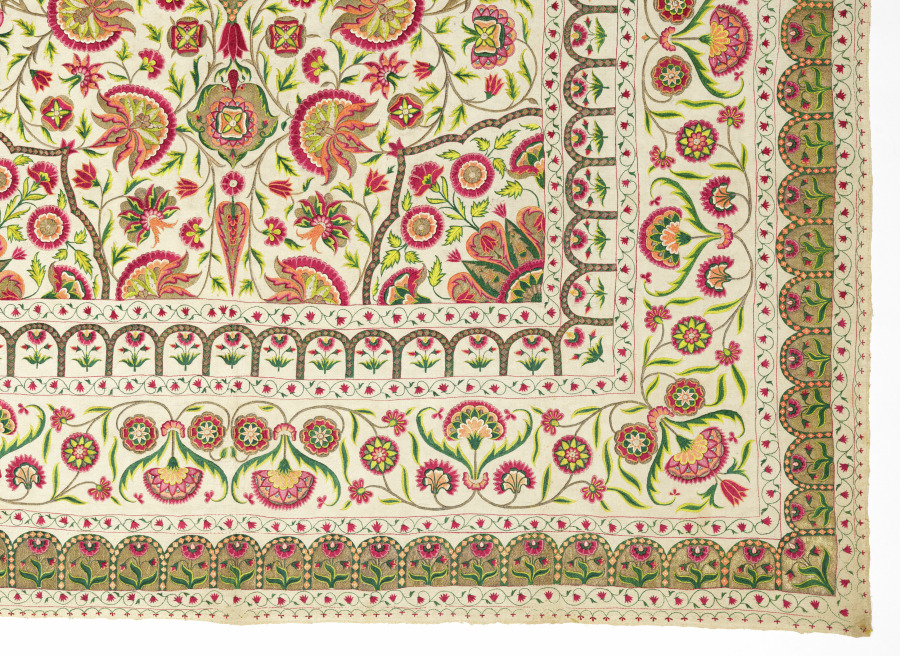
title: Spread with floral medallion pattern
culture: Mughal India, Deccan, probably Goa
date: 1700s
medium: Cotton: plain weave, quilted; silk and gilt-metal thread: embroidery, couched laid work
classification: Embroidery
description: This textile could have been used as a covering for seating on the floor or as a bedspread in either an Indian or European setting. In any case, it was not meant to be walked on. Its material and imagery testify to flourishing international relationships. The arabesque designs, consisting of swirling vines with large and small flowers, recall a radiant paradise and have roots in Persian, Chinese, and Mediterranean sources. The use of gold-wrapped thread had been widespread in Spain and Portugal before it was adopted in India, probably first in Goa, a Portuguese colony on the southwestern coast of India from 1510 to 1961. The vibrant colors are distinctive to this region of India.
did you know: A small blue and yellow bird perches at the center of the otherwise solely floral design.